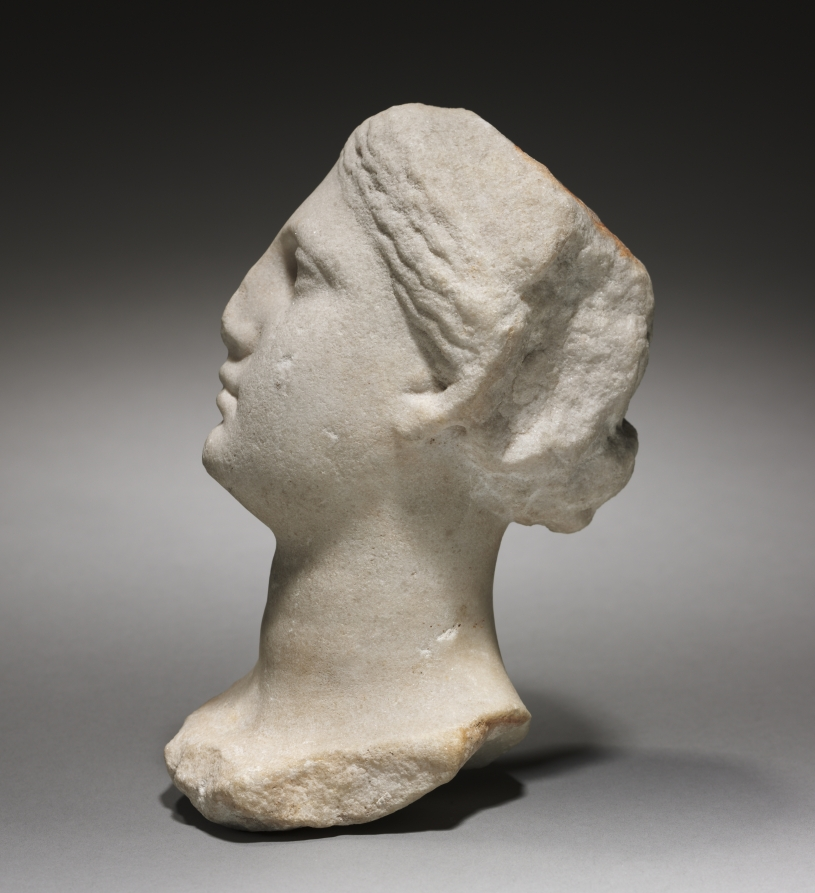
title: Head of a Woman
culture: Greece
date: 400–200 BCE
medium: marble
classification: Sculpture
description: This marble bust of a woman is rendered with the soft, delicate features typical of Greek sculpture of the late fourth and early third century BCE. Her features nearly disappear into the smooth landscape of her face, each curve fading softly into the next. Her hair is held away from her forehead in a series of tight braids pulled back to a bun, now mostly lost.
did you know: Though this hairstyle is often associated with sculptures of Aphrodite, it was also a popular style among mortal Greek women.